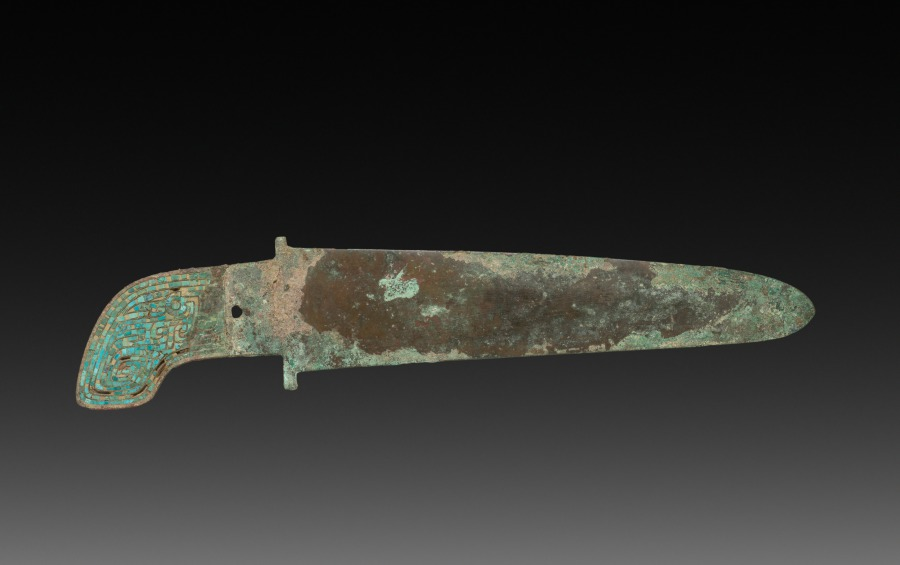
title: Ge (Dagger-Axe)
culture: China, Shang dynasty (c. 1600–c. 1046 BCE)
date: c. 1600–1050 BCE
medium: bronze, inlaid with turquoise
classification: Metalwork